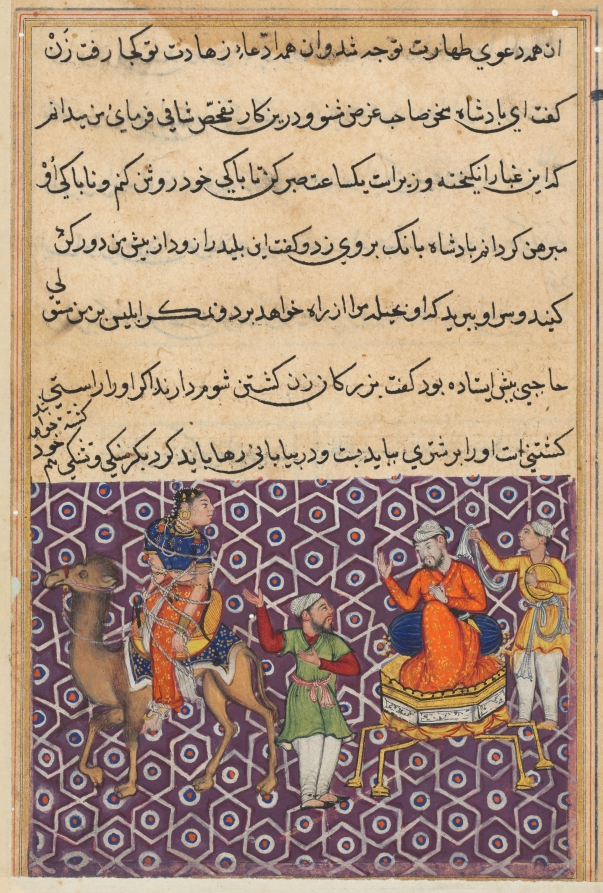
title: King Bahram, who has married Khassa’s daughter, has her tied to a camel to be abandoned in the desert as a result of false accusations made by Khulasa, from a Tuti-nama (Tales of a Parrot): Fifty-first Night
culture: Mughal India, court of Akbar (reigned 1556–1605)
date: c. 1560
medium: gum tempera, ink, and gold on paper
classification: Painting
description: The king, seated on a long-legged throne, furiously orders his wife’s execution. Khulasa, the king’s vizier, has attempted and failed to seduce her. Spurned by the queen’s rejection, he accuses her of committing adultery with another member of the court. At the center of the scene, a minister implores the king to abandon his wife, rather than have her beheaded.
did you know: The king is compared to Rustam, a legendary Persian warrior.